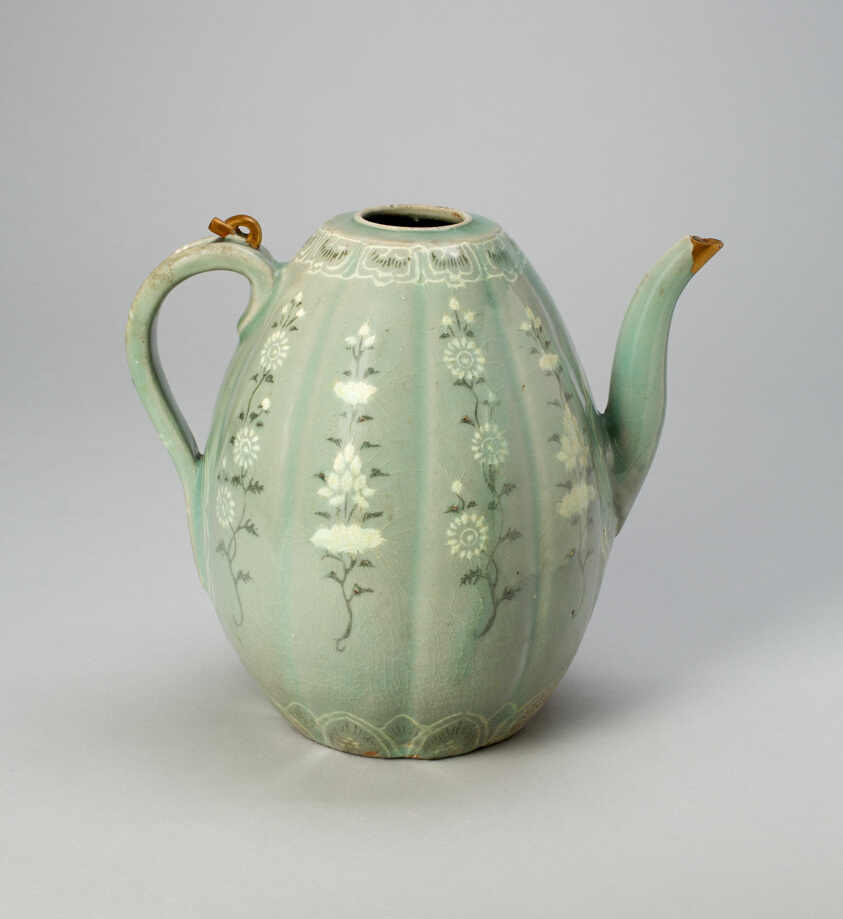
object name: Vessel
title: Melon-Shaped Ewer with Chrysanthemum and Peony Motifs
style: Korean (culture or style)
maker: Korea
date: Goryeo dynasty (918–1392), 13th century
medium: Stoneware with celadon glaze and red and white slip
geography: Korea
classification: ewer (vessel); stoneware; vessel; asian art; ceramics